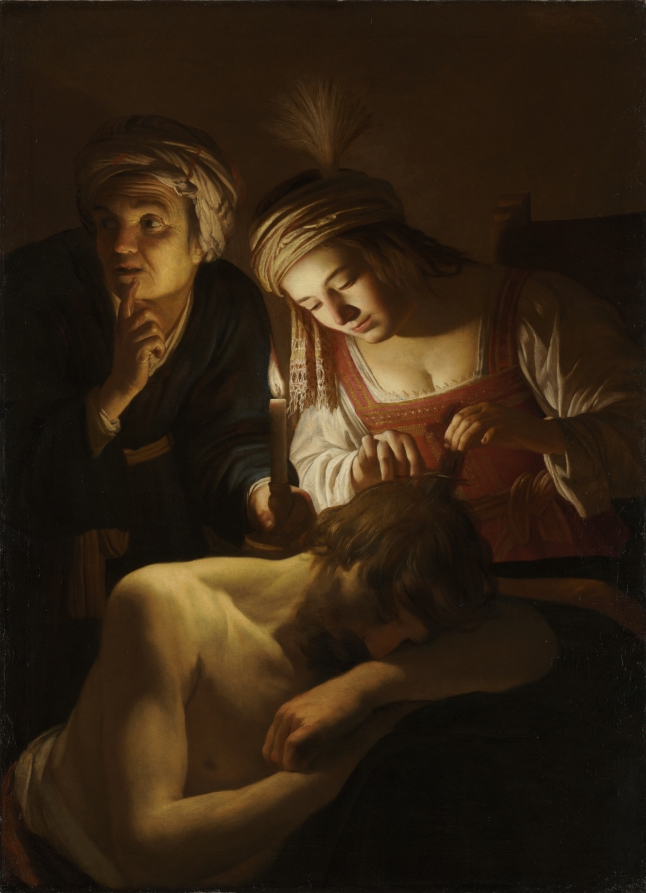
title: Samson and Delilah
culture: Netherlands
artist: Gerrit van Honthorst (Dutch, 1590–1656)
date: c. 1616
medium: oil on canvas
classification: Painting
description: In retaliation for Samson’s single-handed decimation of their army, the Philistines bribed his lover Delilah to discover the source of his strength: his hair, uncut since birth. Samson’s hair was shorn as he lay sleeping in Delilah’s lap, draining his strength and allowing the Philistines to capture him. Honthorst intensified the inherent drama of the scene by limiting his depiction to just three closely packed figures, starkly illuminated by a single candle. The old woman’s silencing gesture involves the viewer in the action, making us complicit in Delilah’s deceit.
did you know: Flickering candlelight and a nocturnal setting enhance the furtive nature of Delilah's actions.